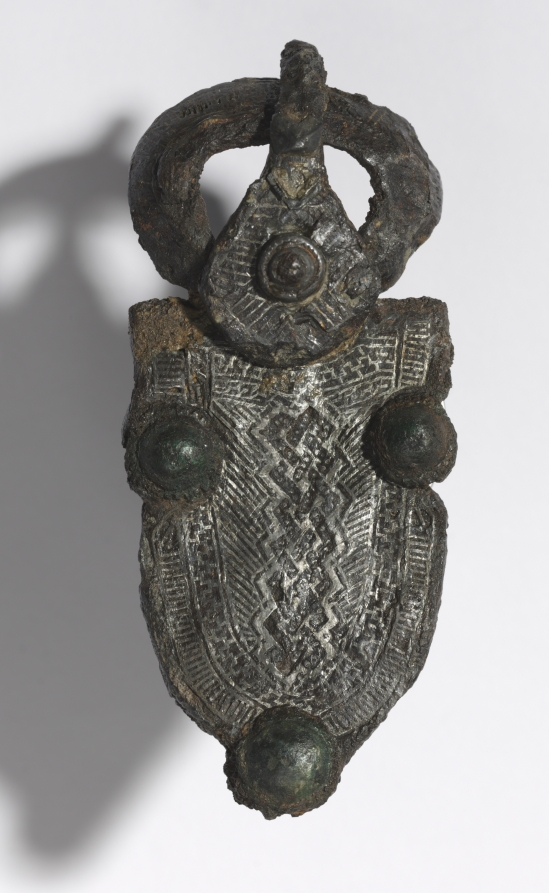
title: Buckle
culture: Frankish, Migration period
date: 600s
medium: iron with silver overlay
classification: Jewelry